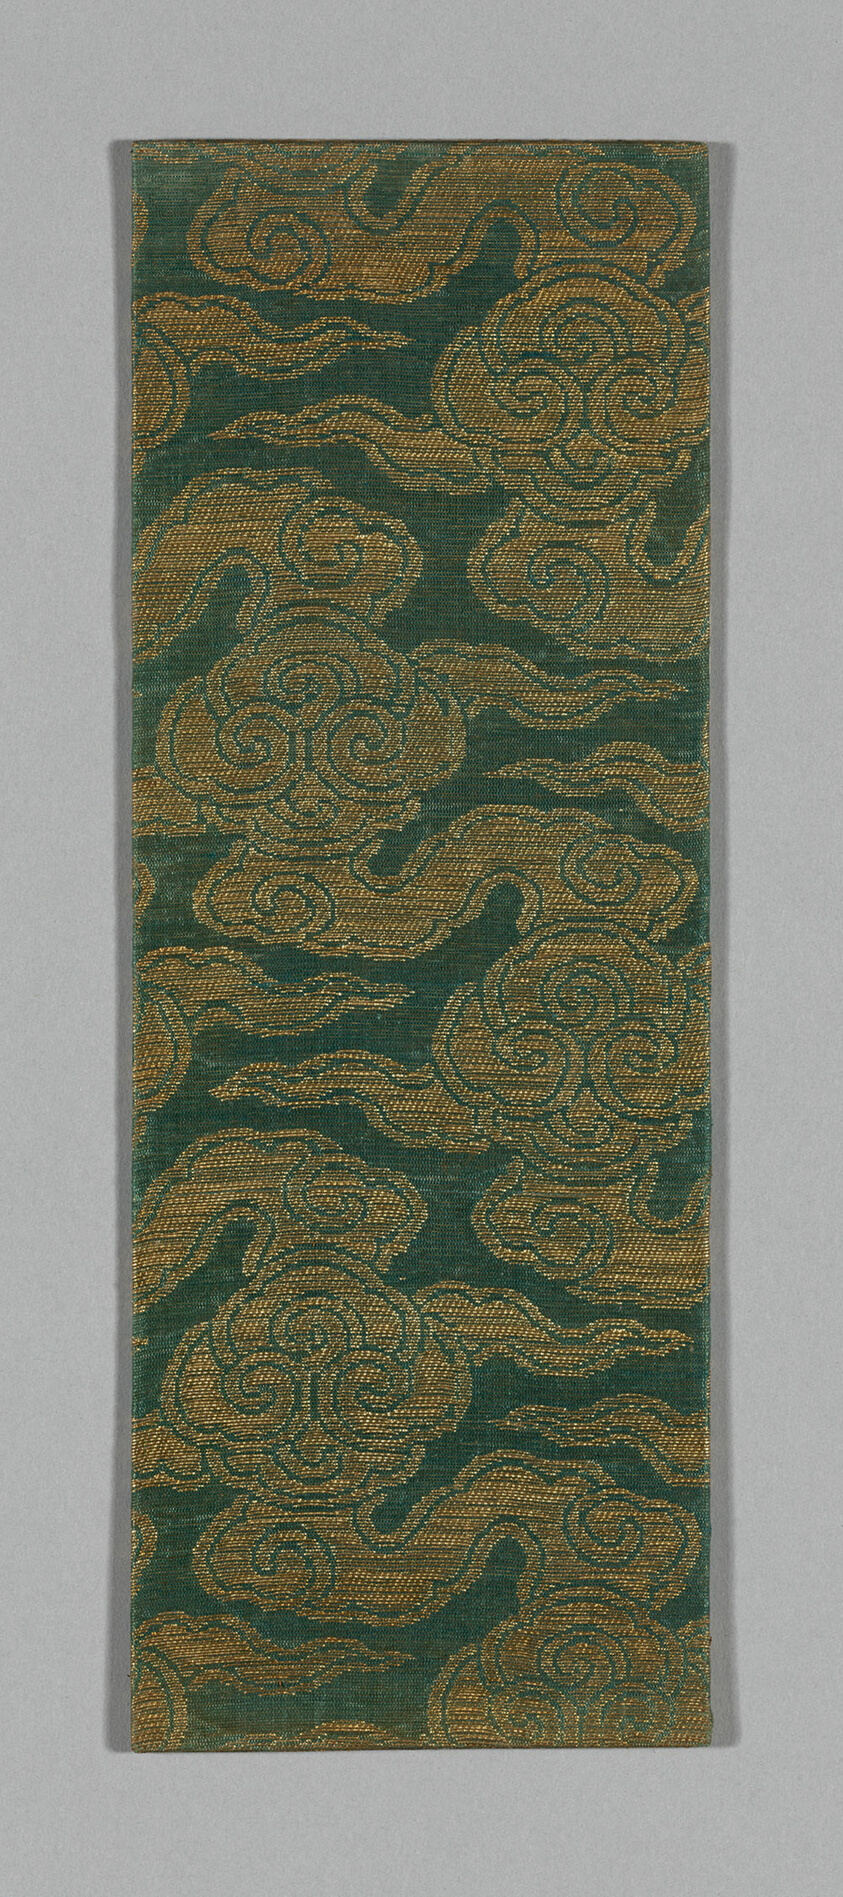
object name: Textile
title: Sutra Cover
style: ming, Chinese (culture or style), East Asian, asian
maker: China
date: Ming dynasty (1368–1644), c. 1590's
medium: Silk and gold-leaf-over-lacquered-paper strip, plain weave with supplementary patterning wefts bound in weft-float faced 1:3 'Z' twill interlacings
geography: China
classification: textile; weaving